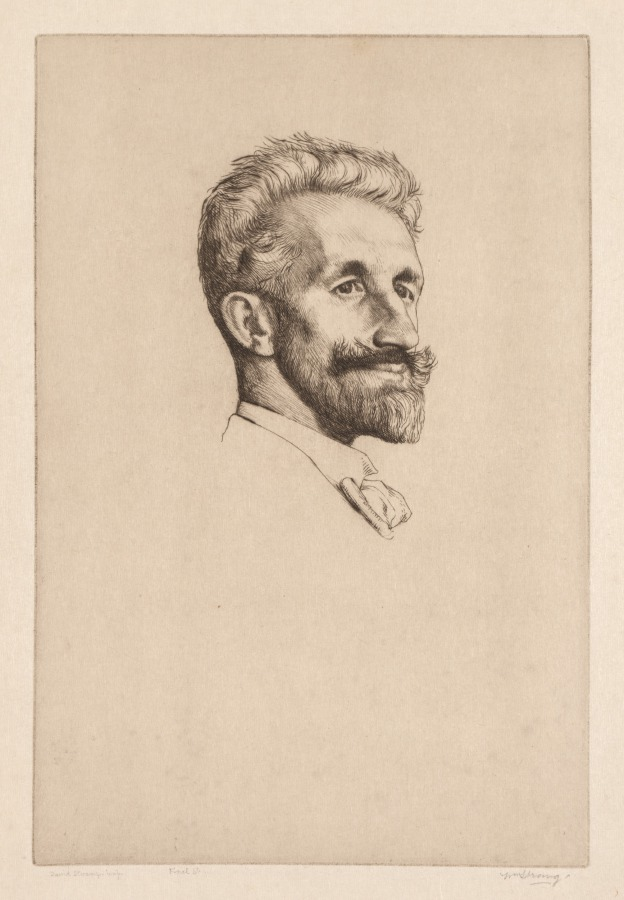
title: Robert Bontine Cunningham Graham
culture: Britain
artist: William Strang (British, 1859–1921)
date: 1898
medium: etching and drypoint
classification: Print